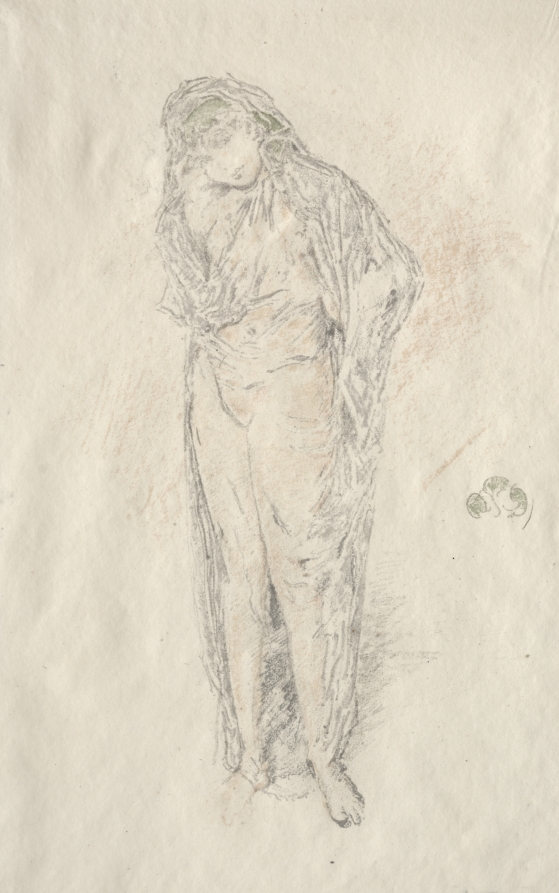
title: Draped Figure Standing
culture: America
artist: James McNeill Whistler (American, 1834–1903)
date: 1891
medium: lithograph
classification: Print